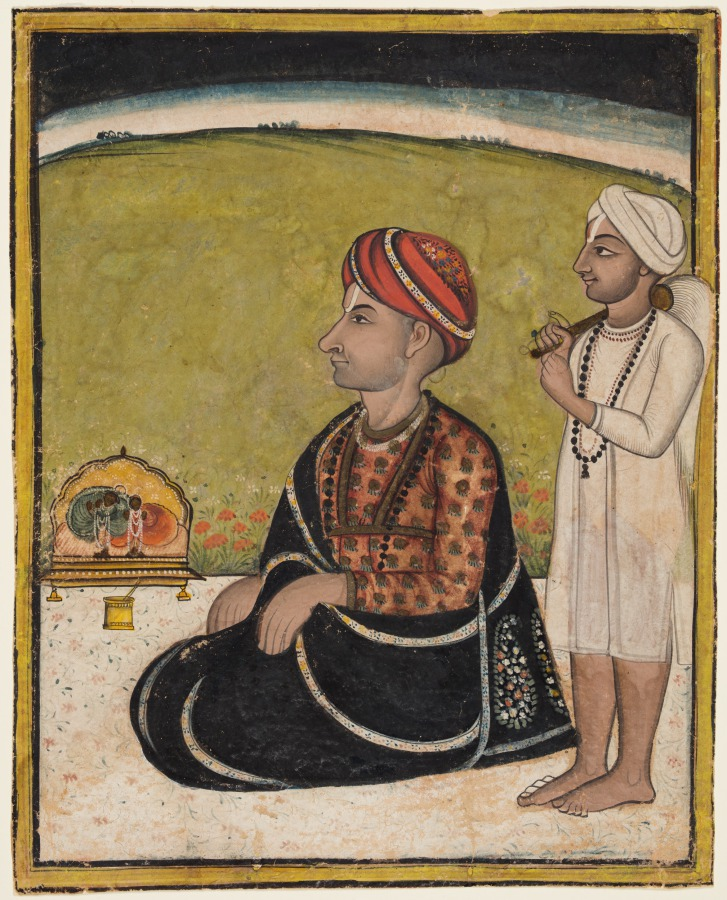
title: A Ruler Seated on a Terrace Worshipping at a Shrine of Radha and Krishna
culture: Central India, Madhya Pradesh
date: c. 1800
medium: gum tempera and gold on paper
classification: Painting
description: A noble clad in a black woolen shawl and a red turban, both with delicate floral embroidery, kneels before a small shrine with icons of Krishna fluting alongside his lover Radha. An attendant dressed in white holds a fly whisk that denotes the kneeling figure’s royal status. The black sky with light horizon suggests that the sun has recently set. In spite of the individualized facial features, this noble remains unidentified.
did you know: Both figures have rosaries of rudraksha beads usually worn by followers of Shiva, instead of Krishna.